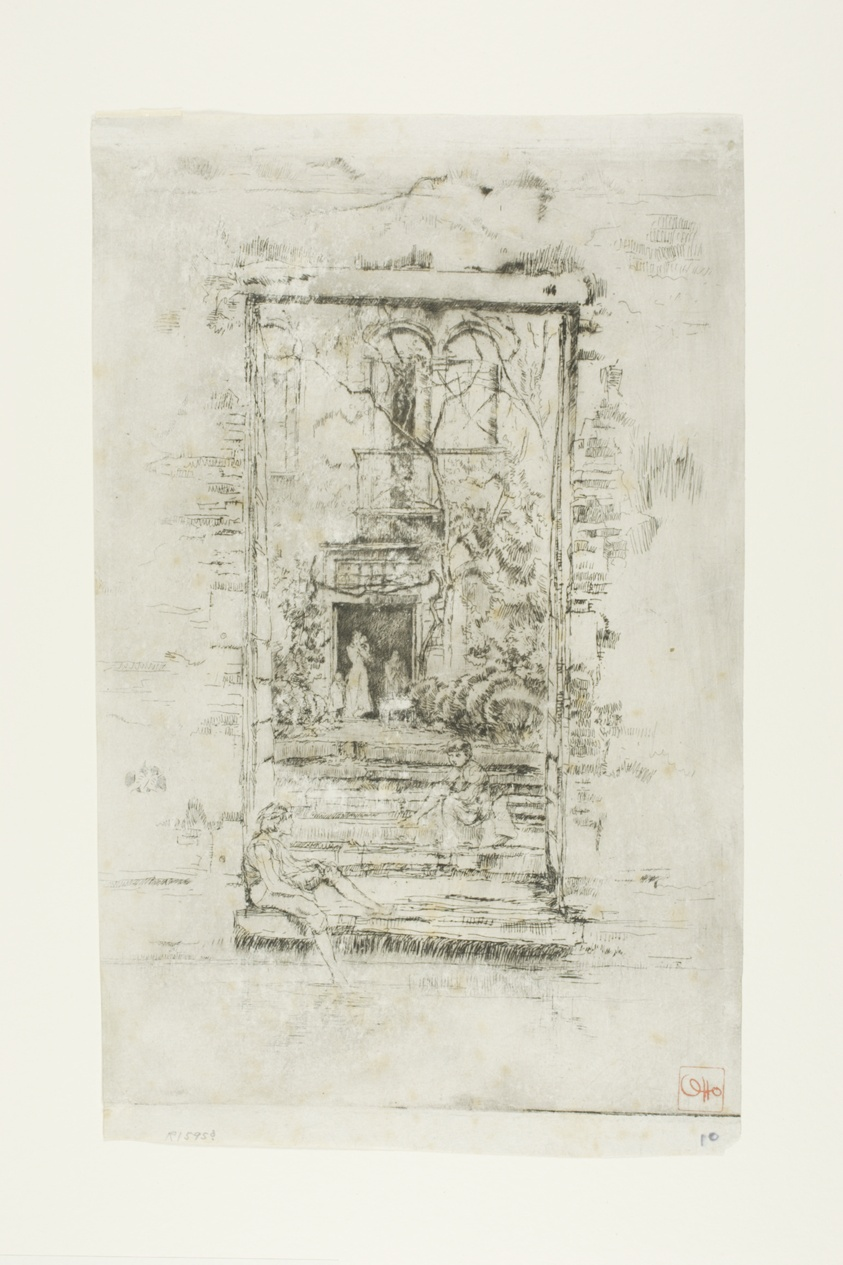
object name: Print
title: The Garden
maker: James McNeill Whistler (American, 1834-1903)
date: 1879/80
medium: Etching and drypoint in black ink on off-white Japanese paper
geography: United States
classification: etching; drypoint; print; prints and drawing; paper